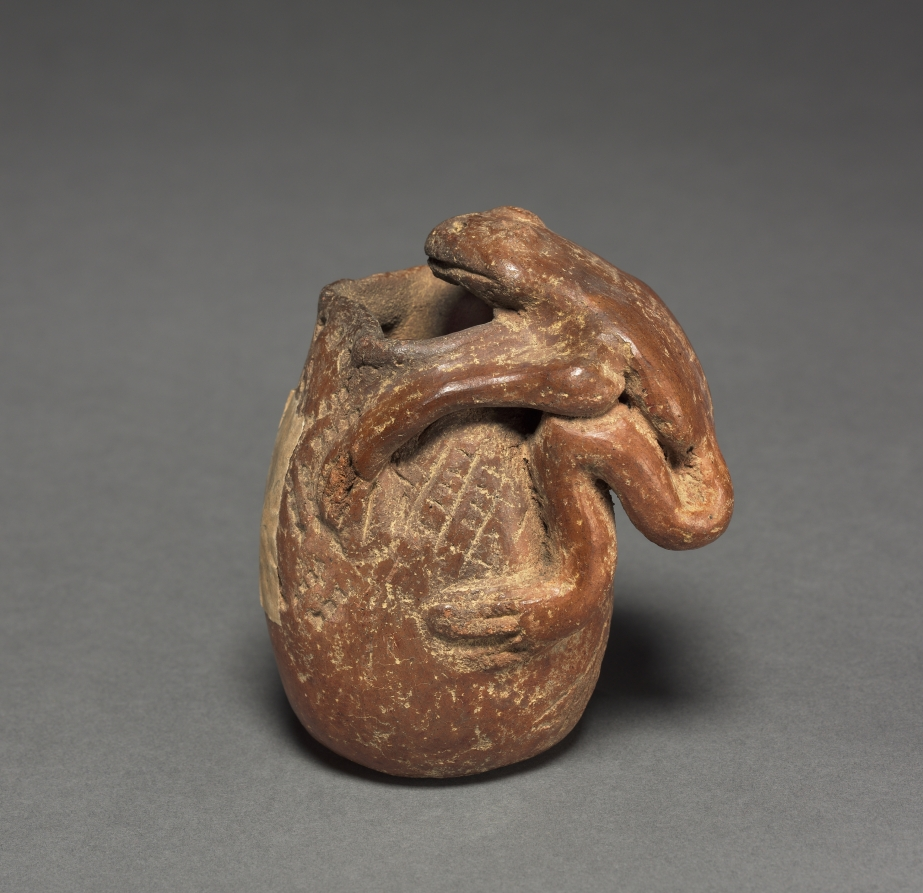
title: Jar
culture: Colombia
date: before 1921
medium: red ware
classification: Ceramic